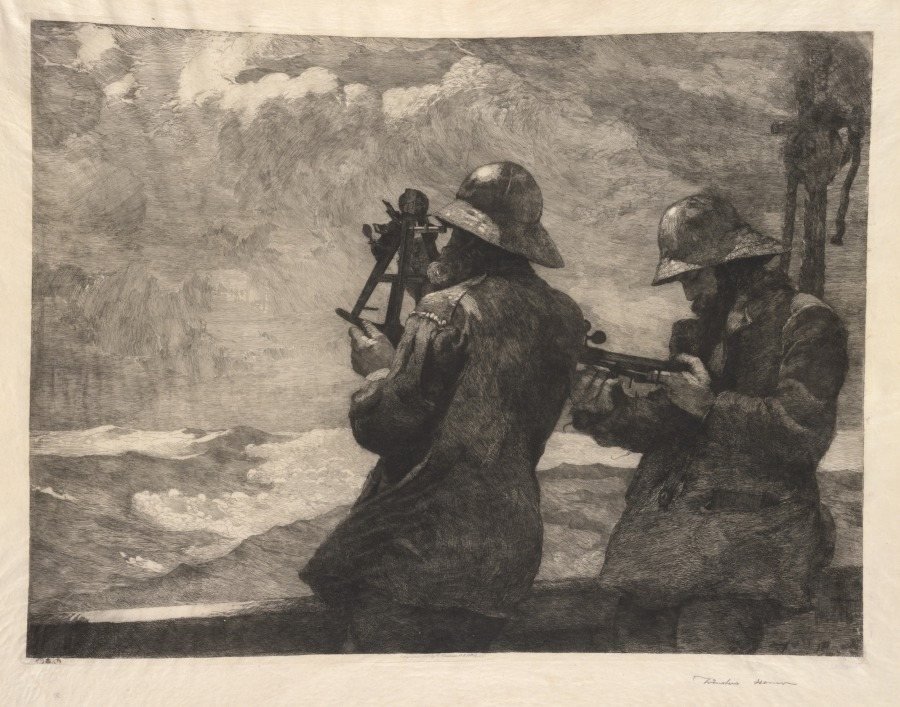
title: Eight Bells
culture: America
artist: Winslow Homer (American, 1836–1910)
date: 1887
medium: etching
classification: Print